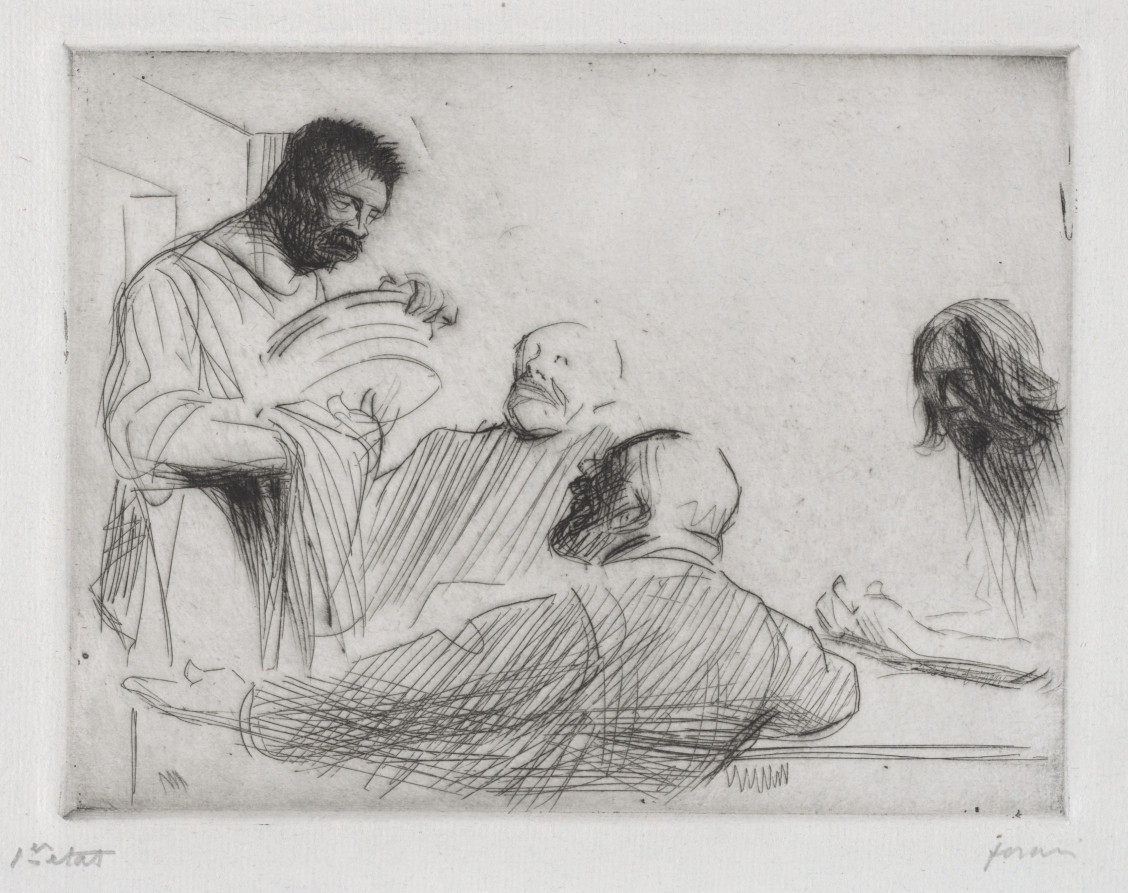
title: Avant le repas à Emmaus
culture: France, 19th-20th century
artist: Jean Louis Forain (French, 1852–1931)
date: 1910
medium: etching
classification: Print